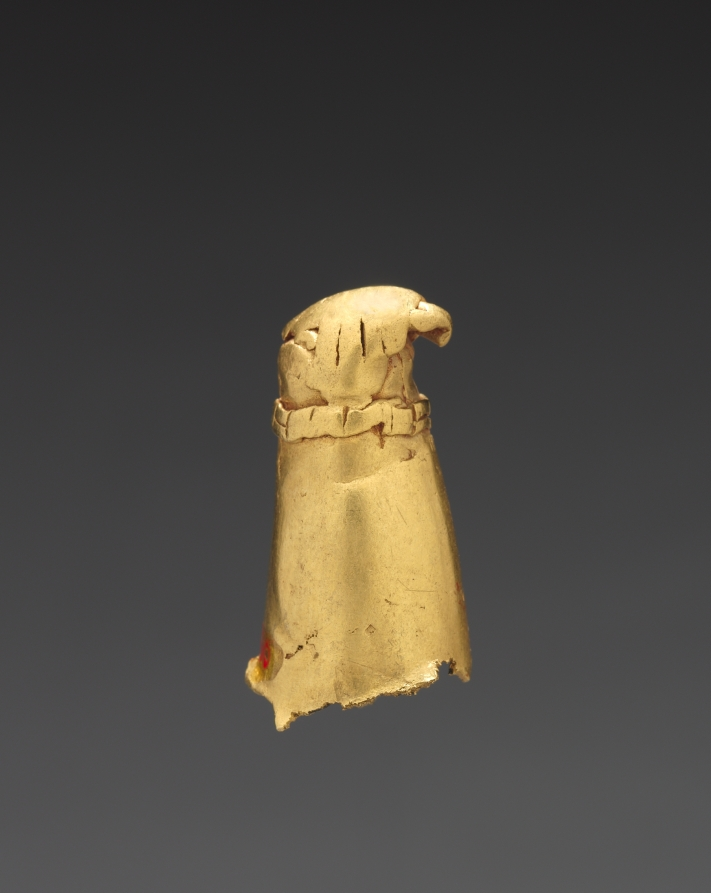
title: Fragment of an Animal Head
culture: Colombia, Quimbaya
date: 1–800 CE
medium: gold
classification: Metalwork